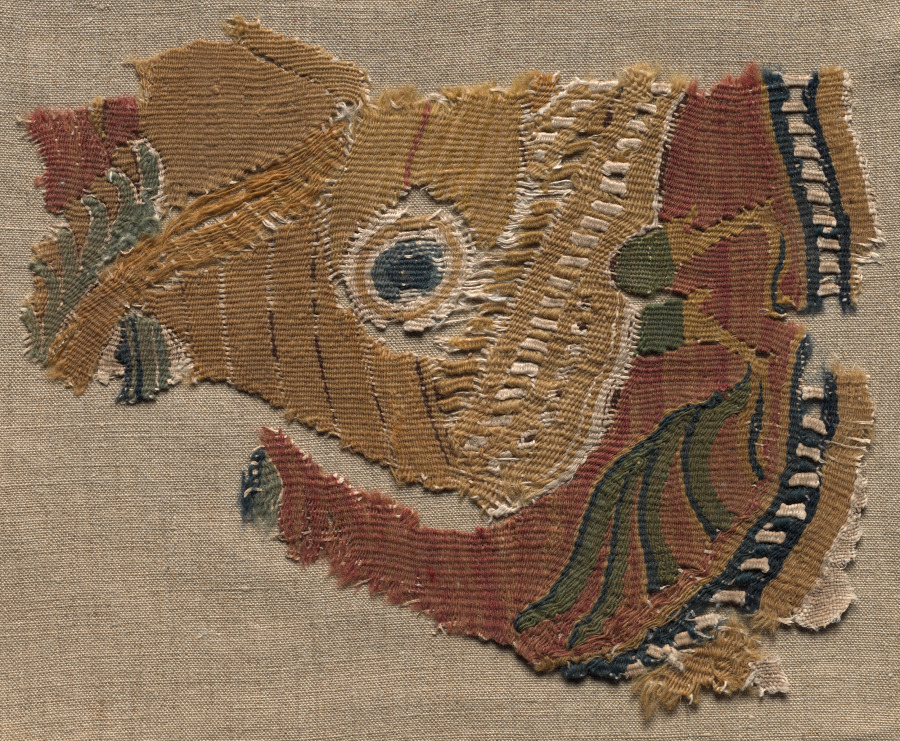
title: Fragmentary Roundel, Ornament from a Large Cloth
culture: Egypt, Al-Bahnasá, Late Tulunid or Second Abbasid period, 9th - 10th century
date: 800s - 900s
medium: tabby weave with inwoven tapestry ornament, linen and wool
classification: Textile